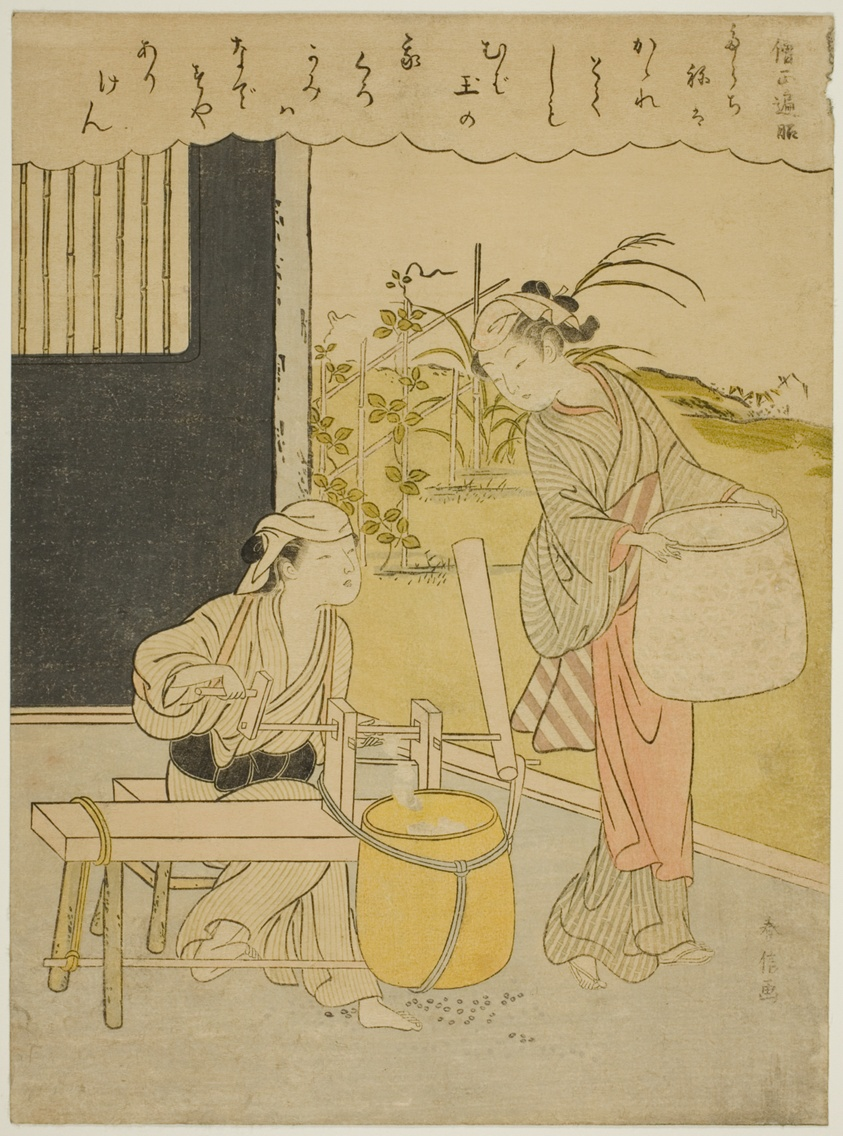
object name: Print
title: Poem by Henjo Sojo, from an untitled series of Thirty-Six Immortal Poets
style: Japanese (culture or style)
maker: Suzuki Harunobu 鈴木 春信; Japanese, 1725 (?)-1770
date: c. 1767/68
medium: Color woodblock print; chuban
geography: Japan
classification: woodblock print; print; asian art